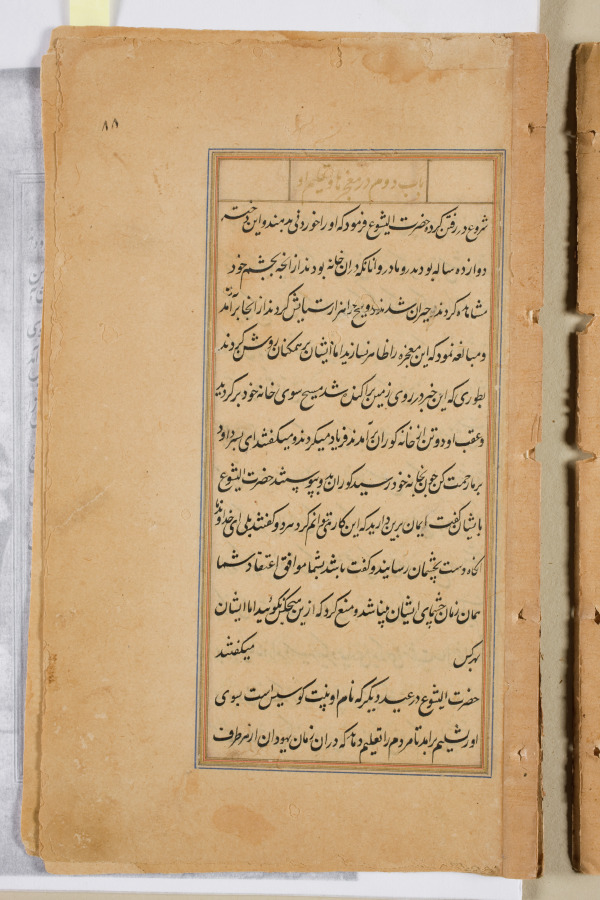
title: Text page from a Mirror of Holiness (Mir’at al-quds) of Father Jerome Xavier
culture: Mughal India, Allahabad, made for Prince Salim (1569–1627)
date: 1602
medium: Ink and gold on paper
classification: Manuscript